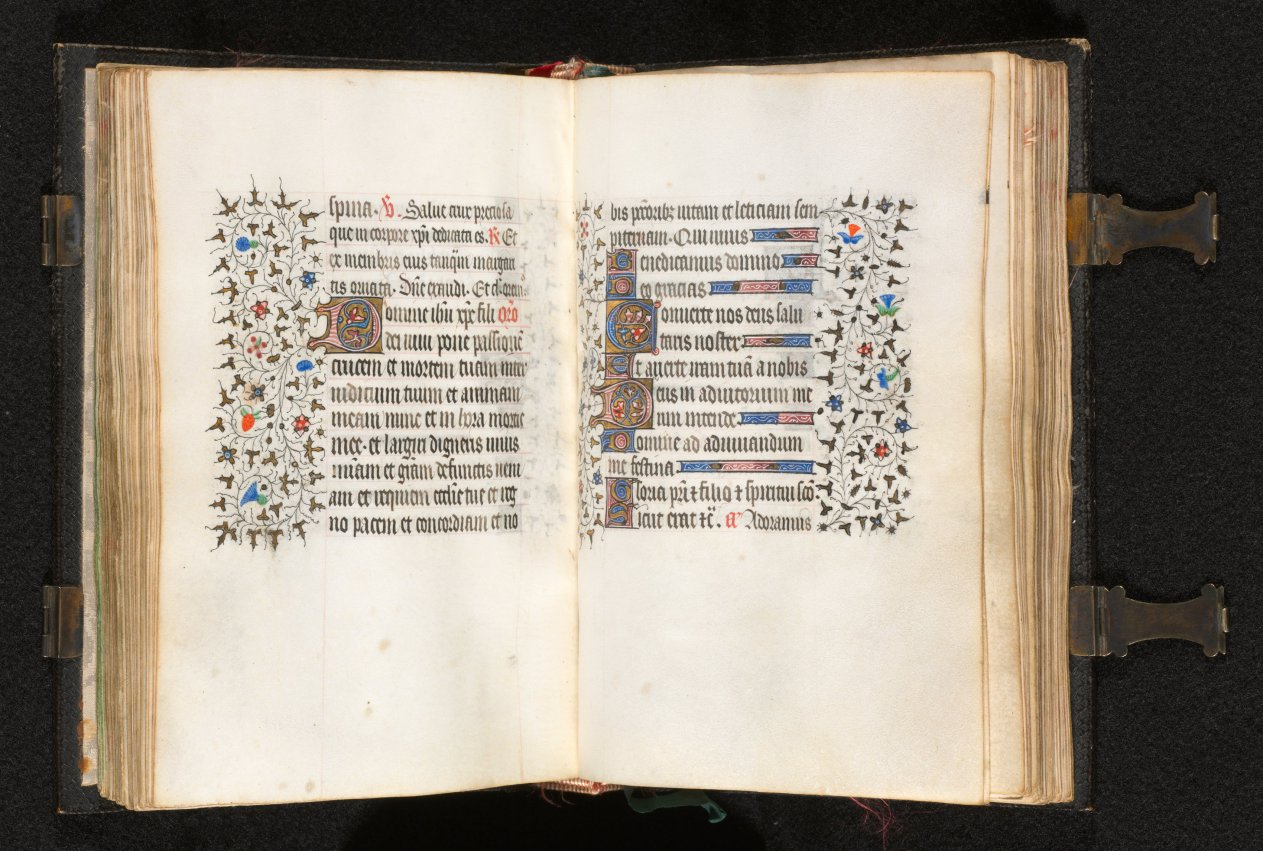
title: Book of Hours (Use of Paris): Fol. 106r, Multiple Initials with Decorated Border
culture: France, Paris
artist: possibly studio or workshop of The Bedford Master (French, Paris, active c. 1405–30)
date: c. 1420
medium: ink, tempera, and gold on vellum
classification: Bound Volume